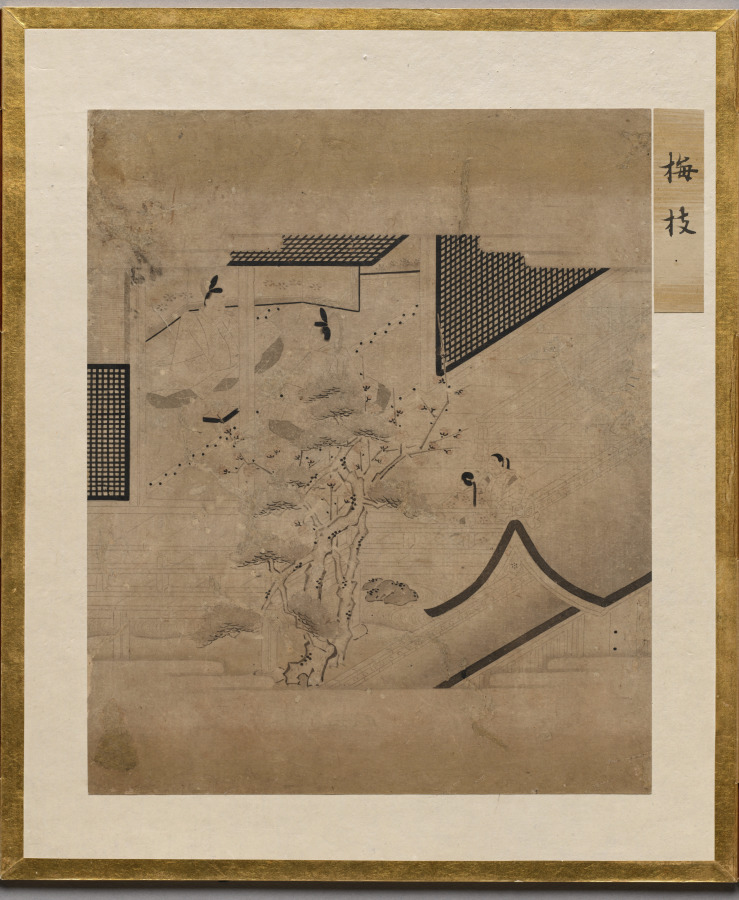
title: Branch of Plum from Album of Illustrations for the Tale of Genji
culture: Japan, Edo period (1615–1868)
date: 1600s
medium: painting in an accordion-style album; ink, light color, and gold on paper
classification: Bound Volume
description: This album contains illustrations for the classic literary work the Tale of Genji, authored in the 1000s by Murasaki Shikibu, an aristocrat of the Heian period (794–1185) court. The scenes are painted in the “white drawing” (hakubyō) mode, in which a fine ink line is used to depict figures and spaces with great subtlety, punctuated only occasionally by traces of red pigment for a character’s lips, a detail of a garment, or a decorative element. These two scenes illustrate episodes from the chapters “Thin Veil of Cloud” (Usugumo) and “Barrier Gate” (Sekiya).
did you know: The illustrations are identified by chapter title in cartouches to the upper right of the paintings.